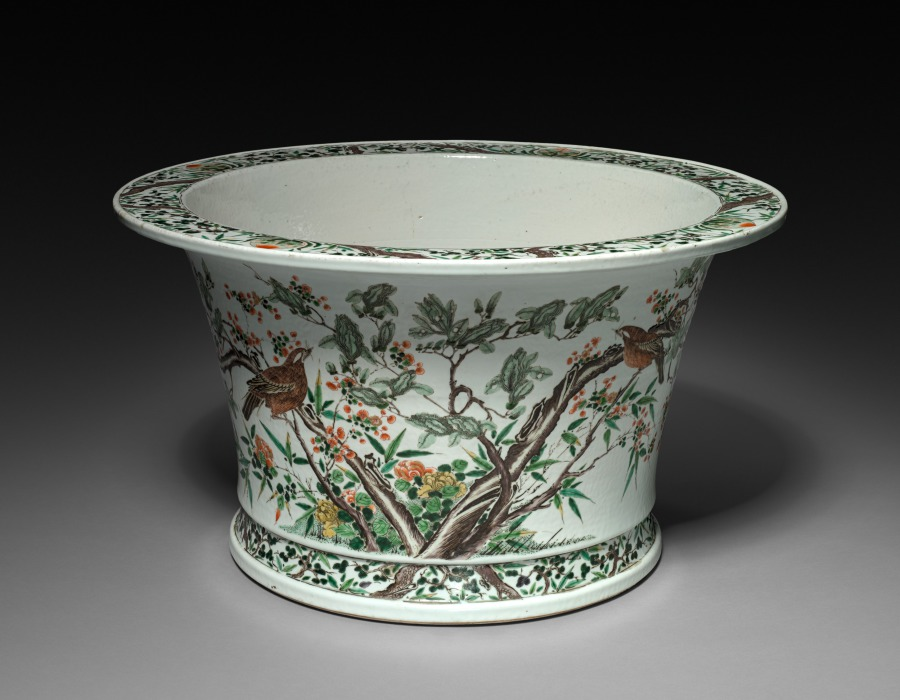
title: Jardiniere with Birds on Flowering Branches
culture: China, Jiangxi Province, Jingdezhen kilns, Qing dynasty (1644–1911), Kangxi reign (1661–1722)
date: 1662–1722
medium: porcelain with famille verte overglaze enamel decoration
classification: Ceramic